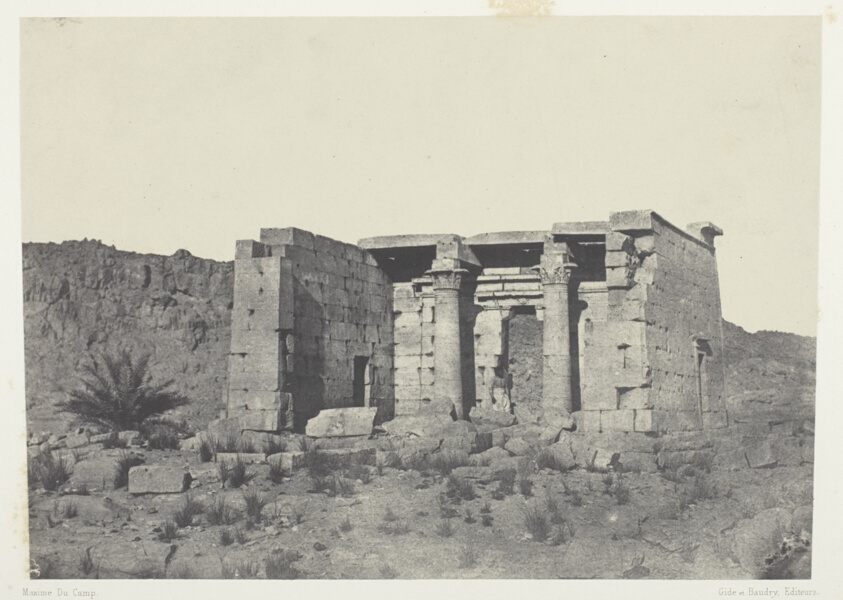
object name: Photograph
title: Temple de Tafeh (Ancienne Taphis), Nubie, plate 88 from the album "Egypte, Nubie, Palestine et Syrie" (1852)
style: 19th century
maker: Maxime Du Camp (French, 1822–1894)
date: 1849/51, printed 1852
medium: Salted paper print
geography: France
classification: salted paper print; photographic process; photography; photograph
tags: Collected by Hugh Edwards, Egypte, Nubie, Palestine et Syrie